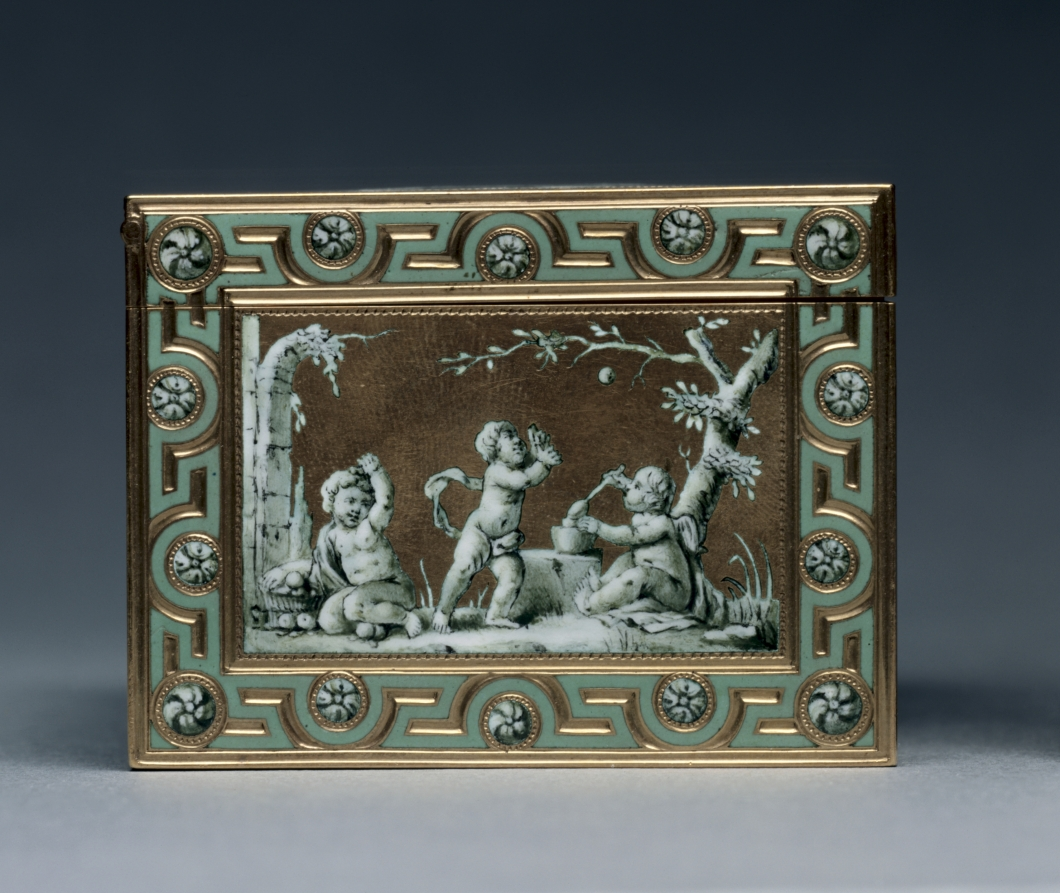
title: Box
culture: France, 18th century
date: c. 1768–1769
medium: gold and enamel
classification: Enamel